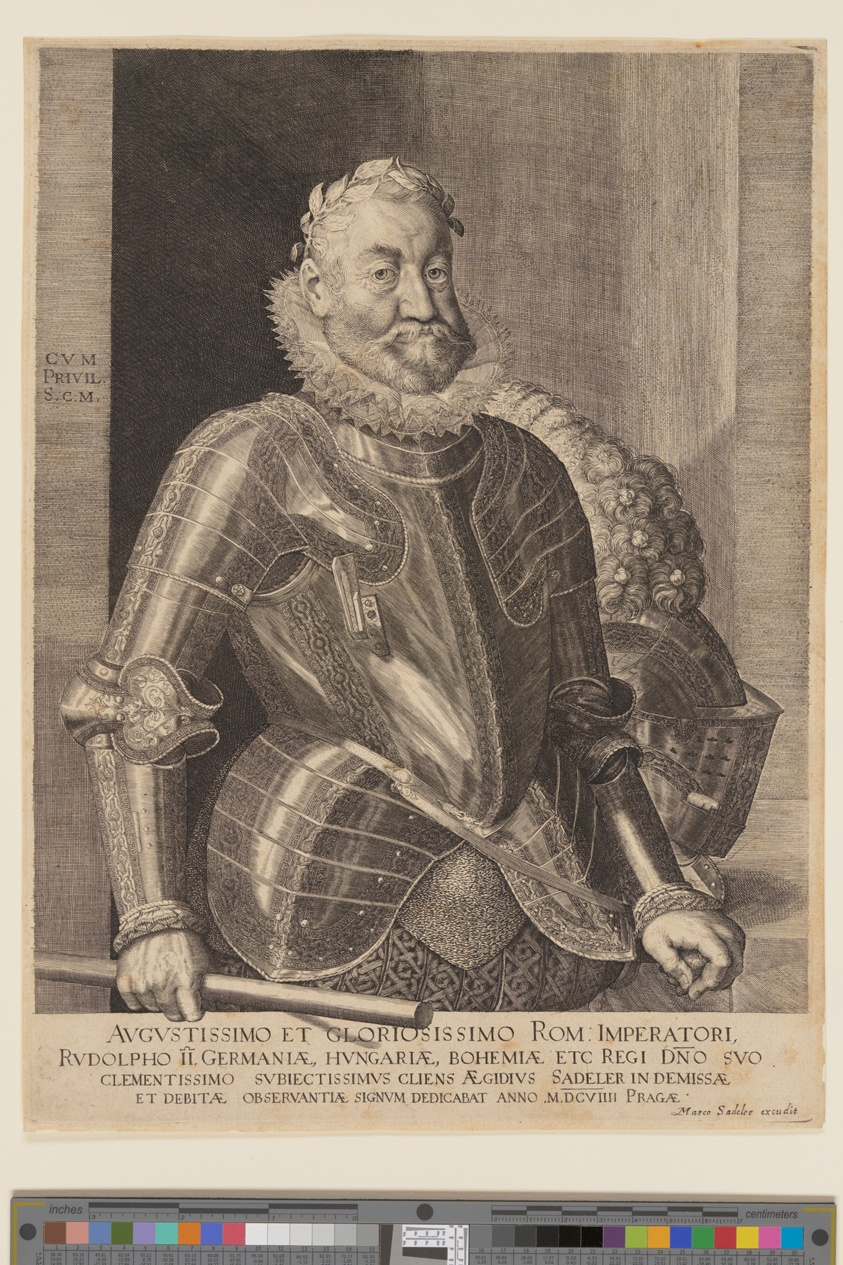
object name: Print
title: Rudolph II, Holy Roman Emperor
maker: Aegidius Sadeler II; Flemish, c. 1570–1629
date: 1609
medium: Engraving on ivory laid paper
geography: Flanders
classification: engraving; paper; print; prints and drawing